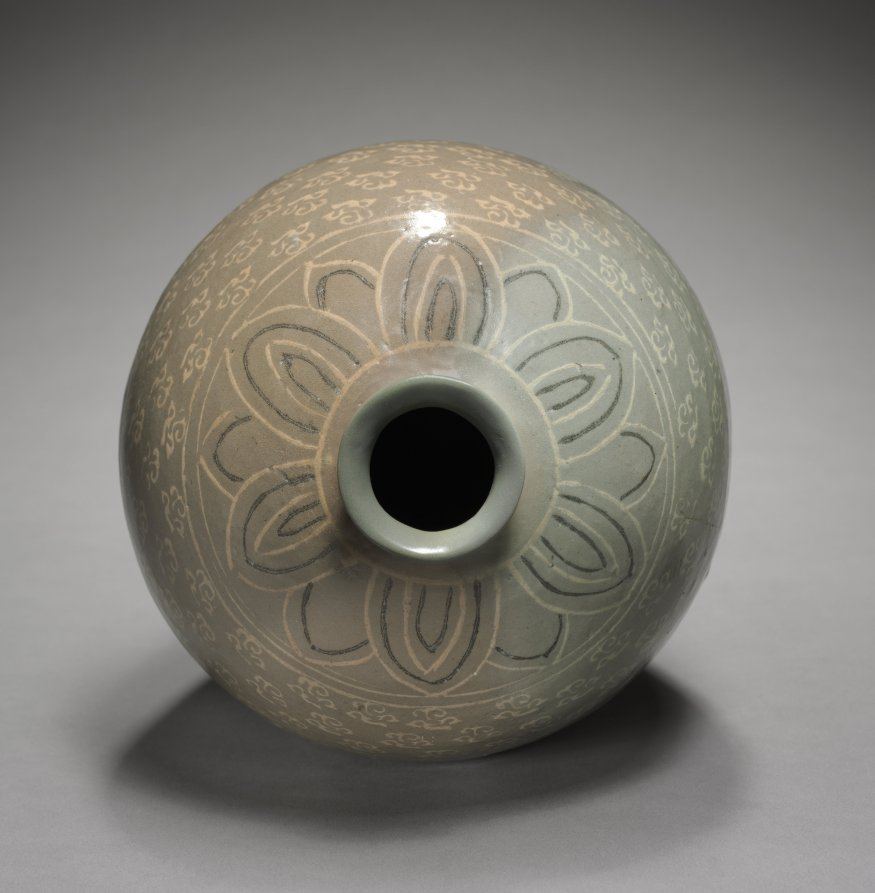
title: Prunus Vase with Inlaid Clouds and Flying Cranes Design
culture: Korea, Goryeo dynasty (918–1392)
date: 1300s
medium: celadon ware with inlaid white and black slip decoration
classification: Ceramic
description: As early as the seventh century, the practice of drinking tea and wine became an important part of elite culture in Korea. Once used to store alcoholic beverages, this type of vase features a wide body followed by a sharply rounded shoulder, a short neck and a small opening. Most of the remaining examples no longer have a lid, but originally it may have had a lid that not only covered the opening, but also served as a cup.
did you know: Prunus vases such as this one are often believed to contain a branch of plum blossoms, but recent research reveals that these lidded vases were also used to contain cooking liquid such as sesame oil.